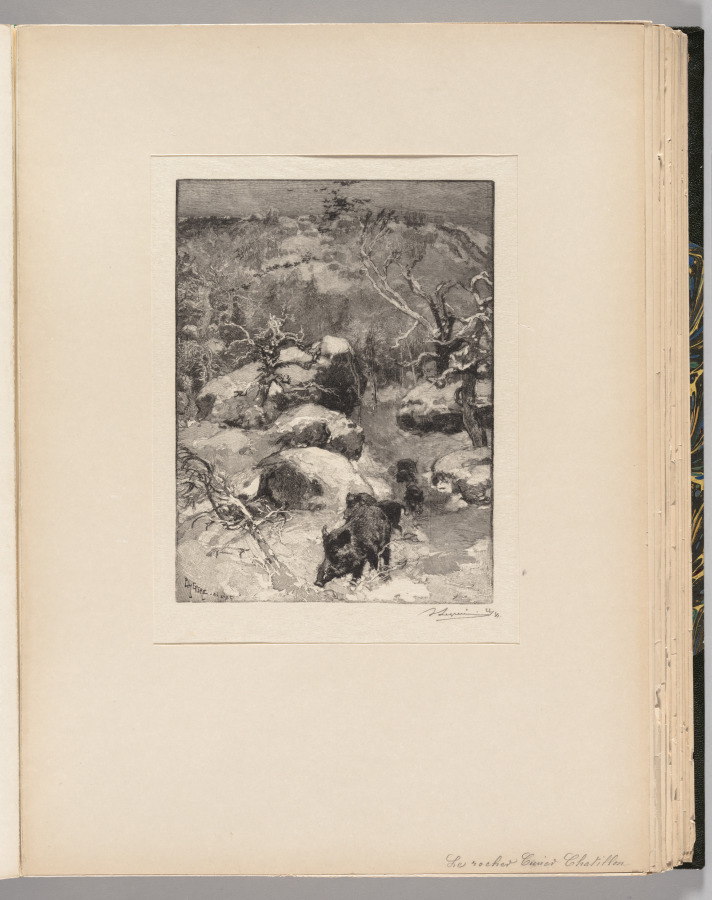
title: Fontainebleau Forest: Cuvier-Châtillon Cliff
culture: France, 19th century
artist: Auguste Louis Lepère (French, 1849–1918)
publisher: A. Desmoulins, Published in Revue Illustrée, 1887–90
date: 1890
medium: wood engraving from bound volume of 34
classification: Bound Volume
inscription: Below image, lower right, in black ink: ALepère 22/35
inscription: in block, lower left: A. LEPERE del. et sc.on window mat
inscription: lower right, in graphite: Roche Cuvier Châtillon